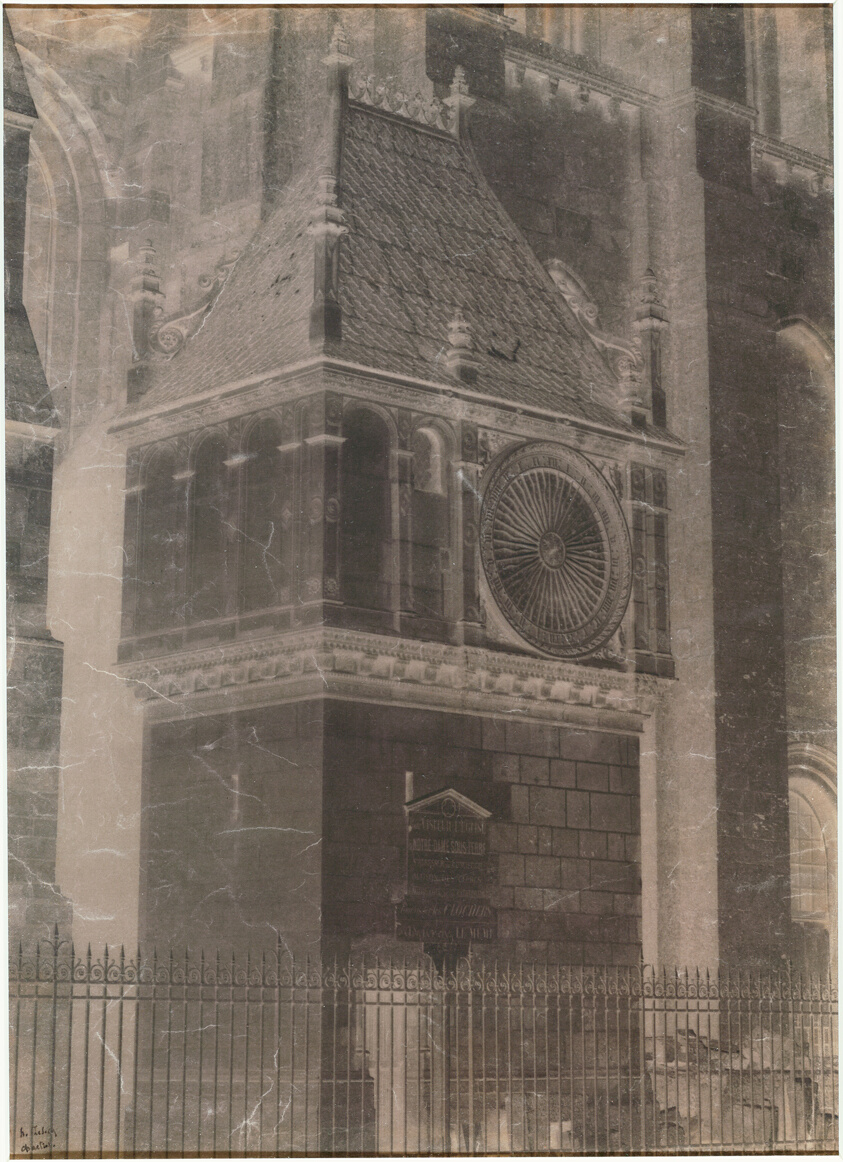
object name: Photograph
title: Untitled (Chartres Cathedral, Pavillon de l'horloge)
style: 19th century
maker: Henri Le Secq (French, 1818–1882)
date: 1851/52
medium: Waxed paper negative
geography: France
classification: calotype negative; negative; negative/transparency; photography; photograph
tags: Paris, writing, photography